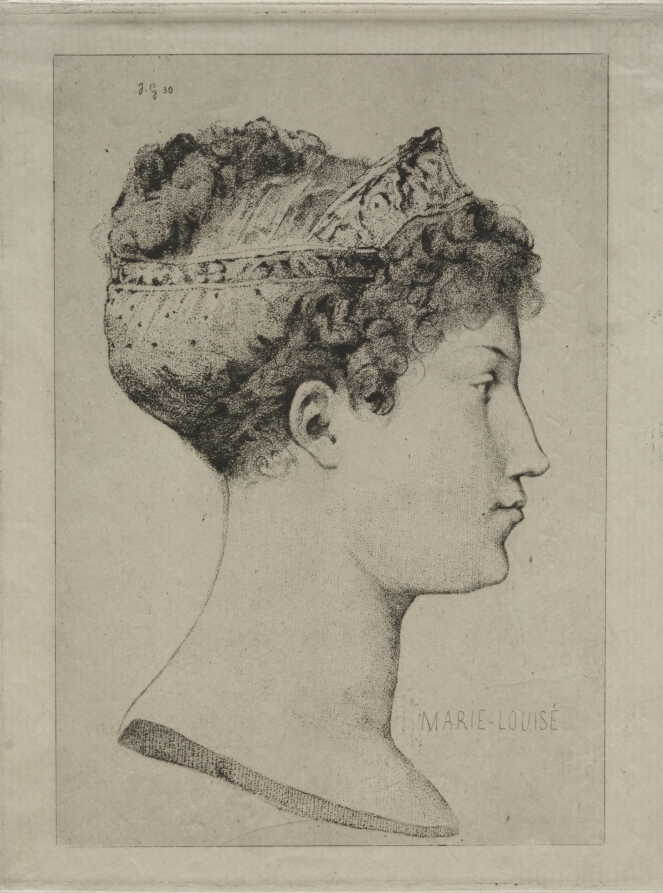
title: Marie Louise in Profile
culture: France, 19th century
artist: Jules de Goncourt (French, 1830–1870)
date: 1860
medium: etching with stipple and roulette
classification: Print